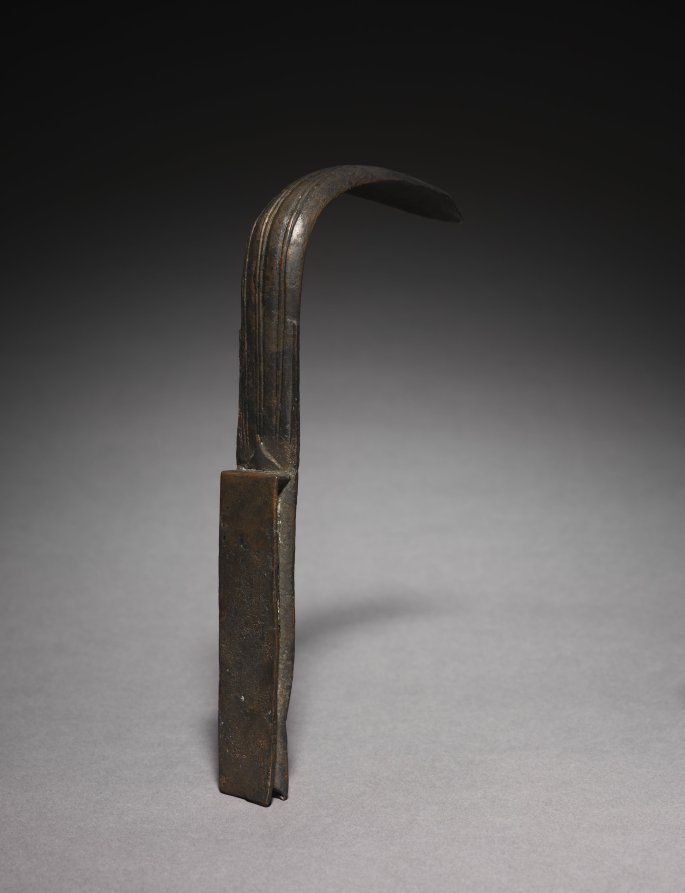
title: Strigil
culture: Italy, Roman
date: 324–476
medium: bronze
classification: Metalwork